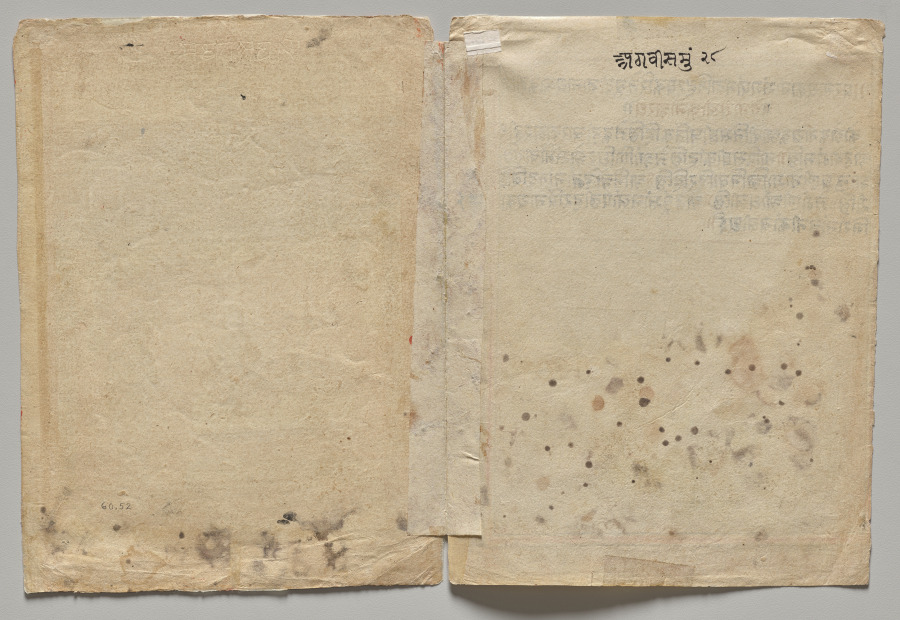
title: A Young, Angry Heroine, Folio 28 from a Rasamanjari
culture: Northwestern India, Rajasthan, Rajput Kingdom of Mewar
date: c. 1615–20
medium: Gum tempera, ink, and gold on paper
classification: Painting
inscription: Recto, upper center: You are expert in flirtation; you are charming; you are my lord and wonderful in your youthful handsomeness.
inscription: Recto, center: Madya Dhira Adhira.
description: The scene of a conversation between two lovers is set within a bedchamber, golden curtains pulled up. The heroine sits on the bed, with three long-necked wine vessels on the wall behind her. A brass ewer for washing with water is on the floor behind the bed.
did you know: Men applied fragrant black pastes to their underarms.